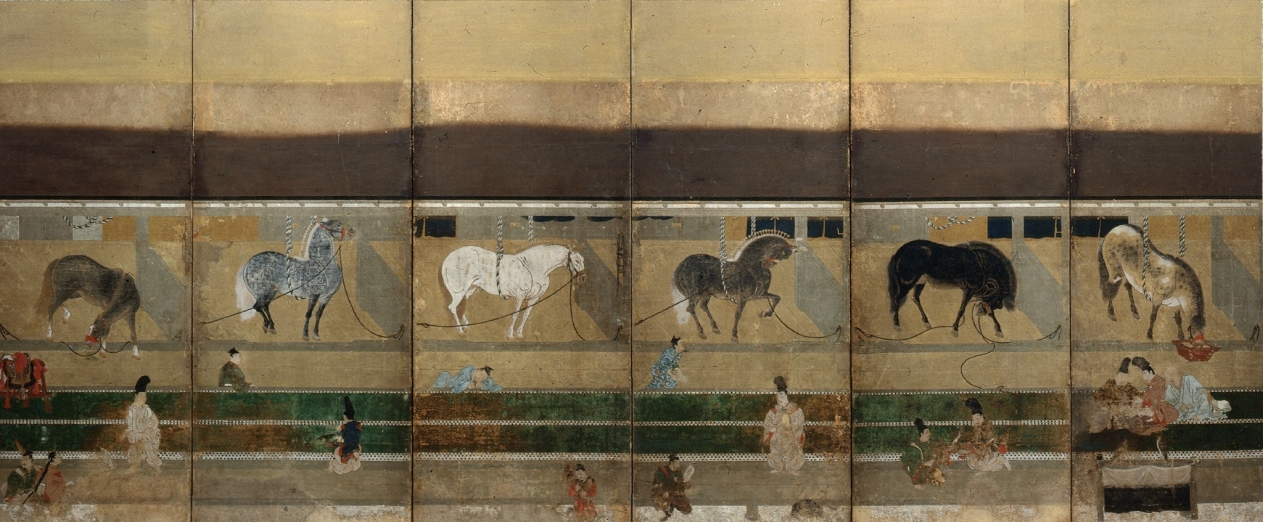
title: Horse Stable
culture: Japan, Muromachi period (1392–1573)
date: early 1500s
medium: One of a pair of six-panel folding screens; ink, color, and gold on paper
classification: Painting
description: Prized horses in stables may be the main theme of the pair of screens to which this screen belongs, but a lot of action is happening on the verandas. Here, people challenge one another at two different board games, go and shōgi. A lively atmosphere develops in the interplay of the dynamic horses and the strategic games.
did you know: Shōgi means "military leader's board game."